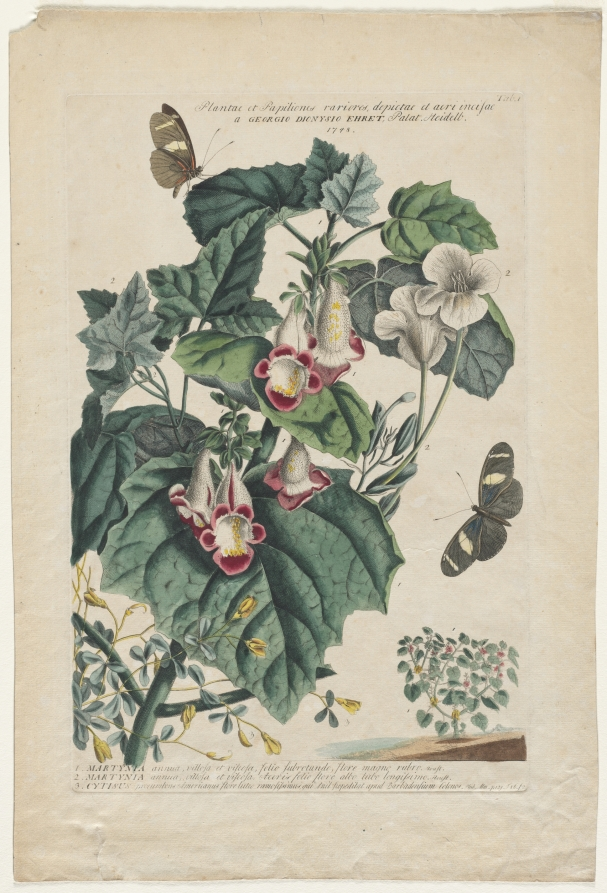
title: Plantae et Papiliones rariores: Martynia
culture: Germany, 18th century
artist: Georg Dionysius Ehret (German, 1708–1770)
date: 1748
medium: engraving, hand-colored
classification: Print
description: Georg Ehret met Carolus Linnaeus in 1736. The dominant botanical artist in the mid-18th century, Ehret settled in England where the nobility clamored to receive his instruction. He commented in his autobiography, “If I could have divided myself into twenty parts I could still have had my hands full.” Ehret struck a fine compromise between the artist and the scientist. “While he did not slavishly imitate what he saw, neither did he allow his feeling for the color and design of flowers distract him from the fundamentals of plant structure,” confirms Wilfrid Blunt, author of The Art of Botanical Illustration. Ehret’s crisp forms betray a sureness of touch, vigor of handling, and unerring instinct for design.